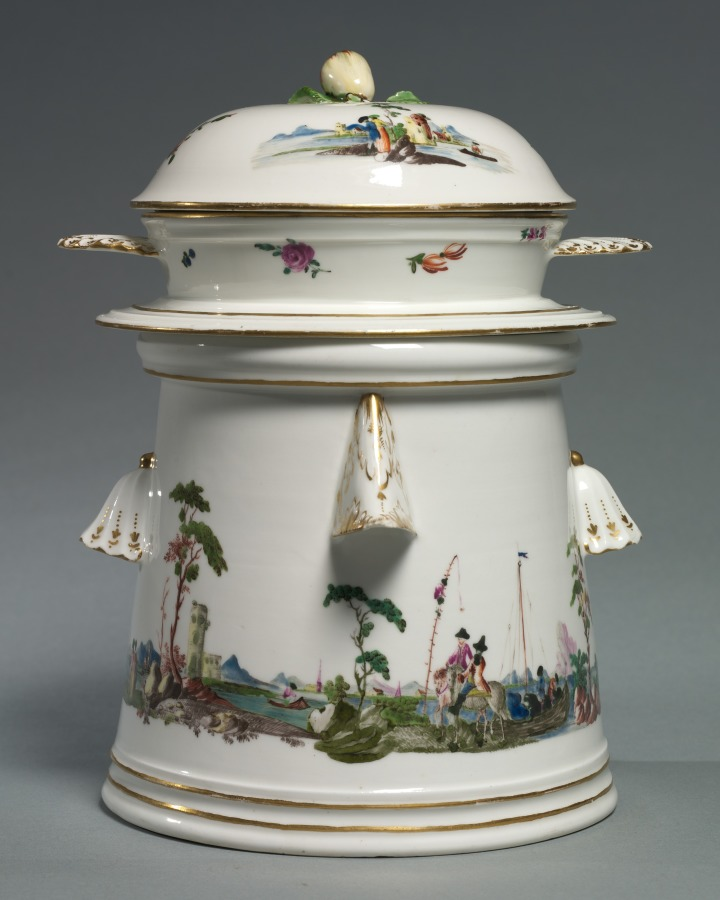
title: Food Warmer (Veilleuse)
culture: Germany, Nymphenburg, 18th century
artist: Nymphenburg Porcelain Factory (German, founded 1747)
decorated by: probably by Georg Christoph Lindemann (German)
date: c. 1758–1760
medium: porcelain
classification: Ceramic